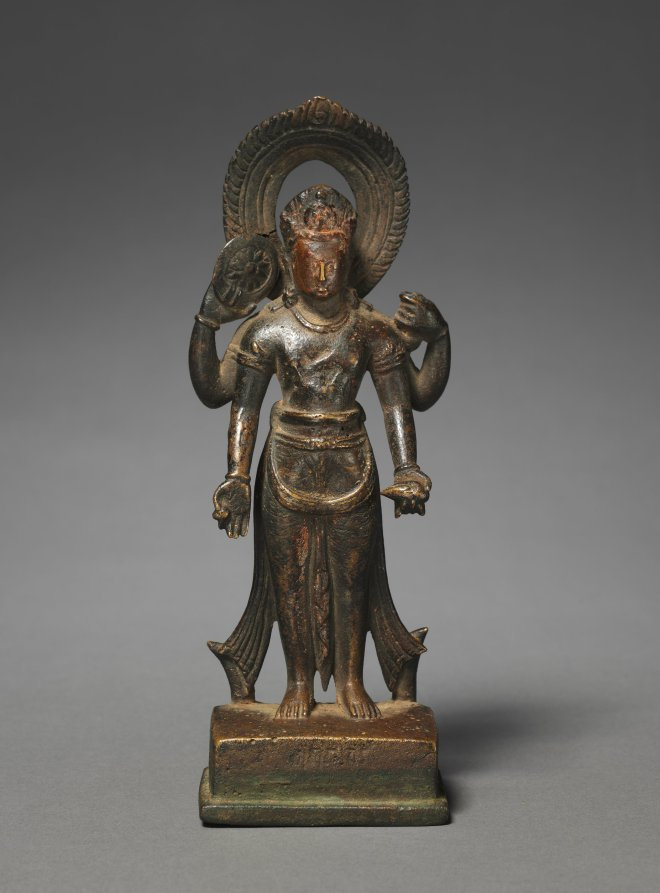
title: Vishnu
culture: Nepal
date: c. 800s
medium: bronze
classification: Sculpture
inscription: Pedestal inscribed